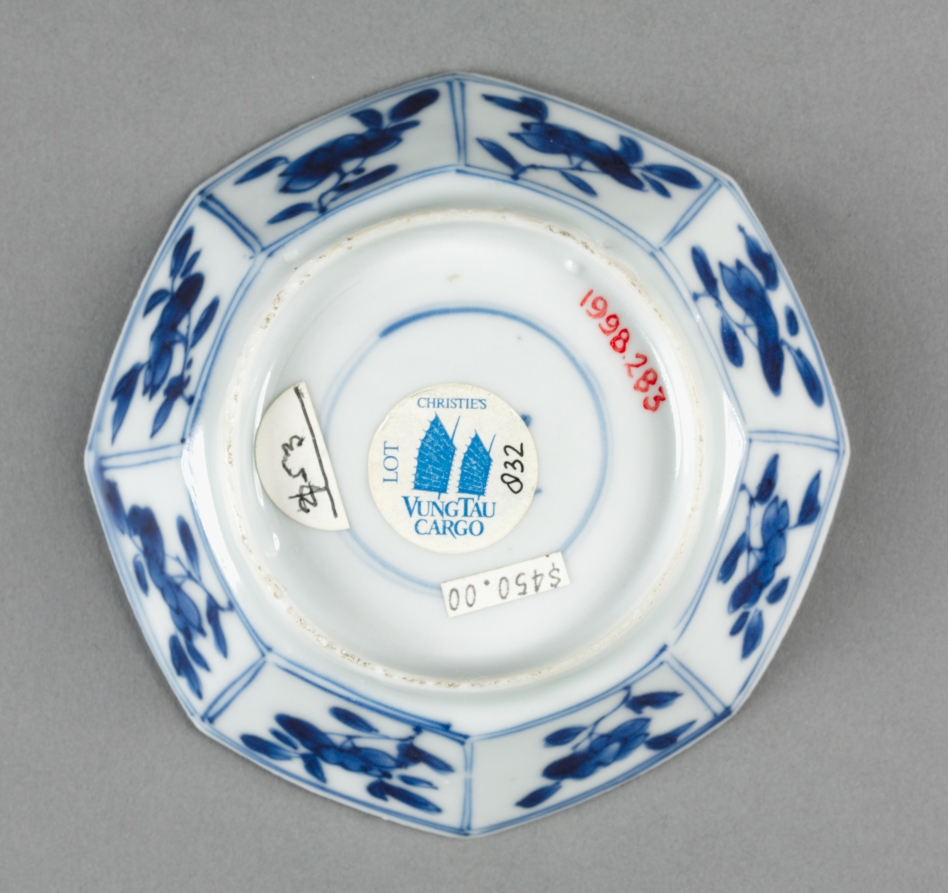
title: Saucer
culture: China, Qing dynasty (1644-1911)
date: c. 1690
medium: porcelain with blue and white decoration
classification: Ceramic